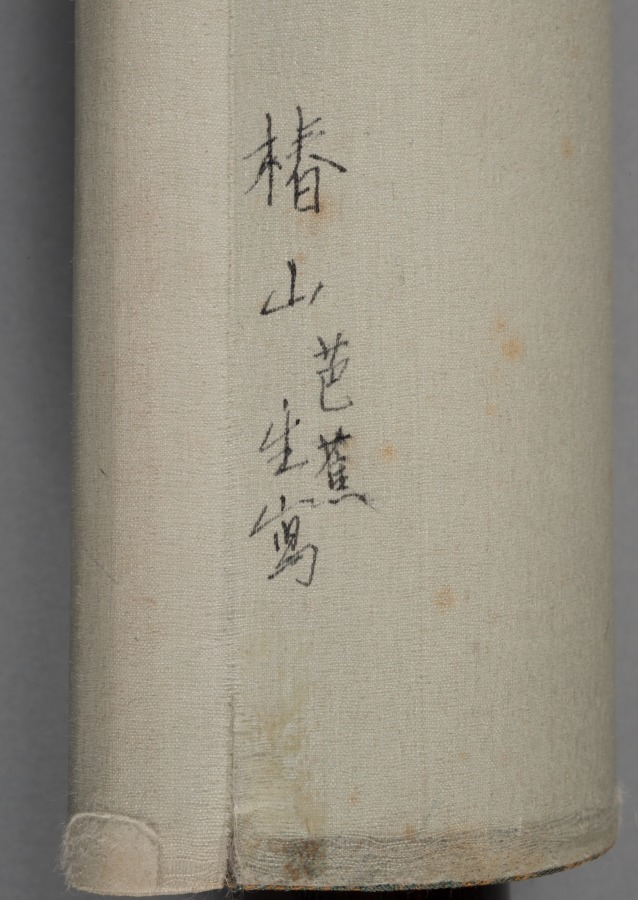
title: Banana Plant and Chrysanthemum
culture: Japan, Edo period (1615–1868)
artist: Tsubaki Chinzan (Japanese, 1801–1854)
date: c. 1820–54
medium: hanging scroll; ink and color on paper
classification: Painting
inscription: artist's inscription and two seals middle right side.